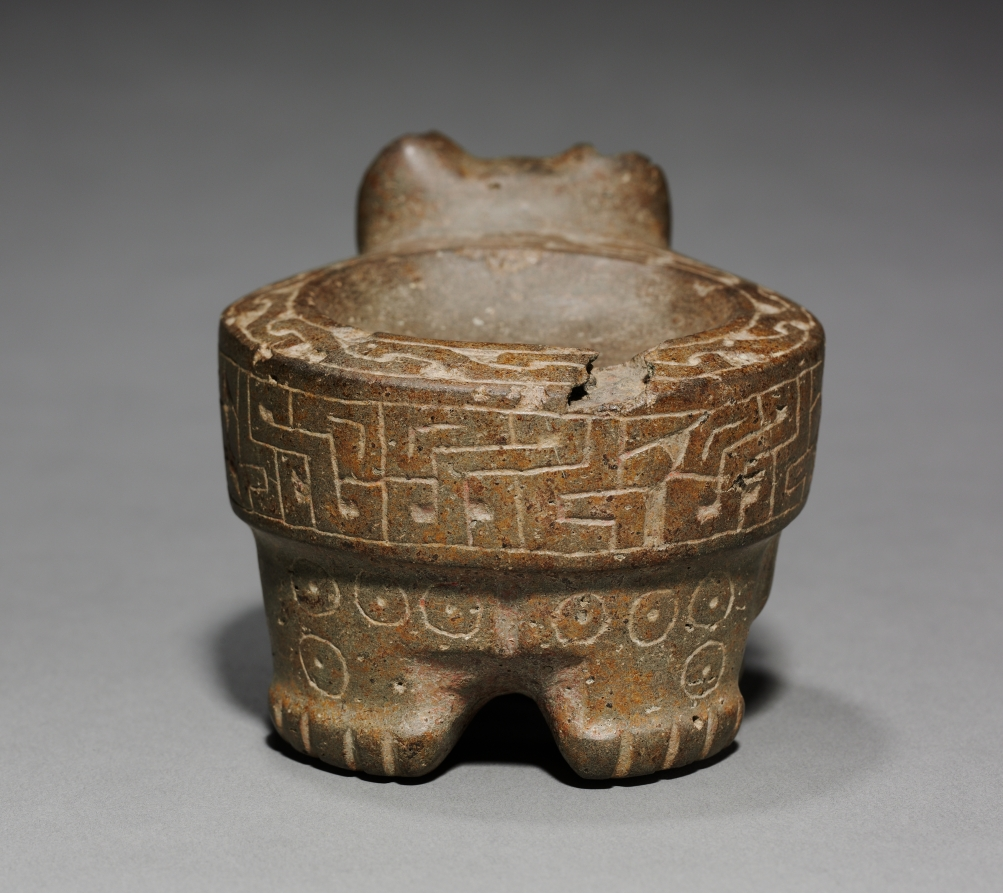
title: Feline Mortar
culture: Peru, North Highlands, Pacopampa(?), Chavín style (900-200 BCE)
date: 700–1 BCE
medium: stone, pigment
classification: Stone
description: Size suggests that this Chavín-style mortar was not used to grind bulky staples like corn, but instead pigments or plant hallucinogens used in religious rites to achieve spiritual insight and communion with cosmic forces. This may come from Pacopampa, a site in the northern highlands where elites adopted Chavín deities and worshiped them alongside local deities. These small sculptures illustrate the appeal and the spread of Chavín religion.